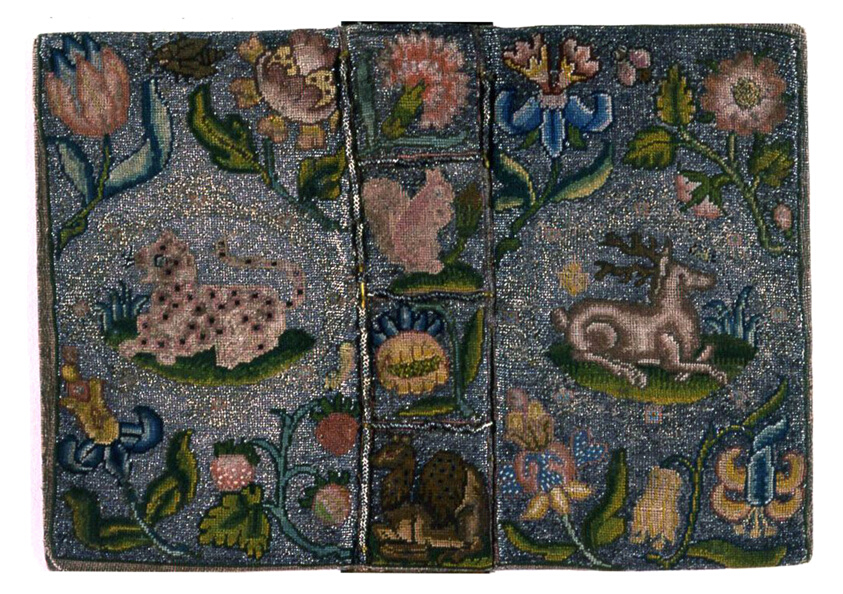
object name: Book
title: Book Cover for the Holy Bible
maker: England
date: c. 1700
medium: Linen, plain weave; embroidered with silk floss and silk creped yarns, gilt- and silvered-metal-strip-wrapped silk, and gilt-metal purl in reverse tent, satin, and tent stitches; couching and French knots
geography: England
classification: textile; needlework (visual works); book